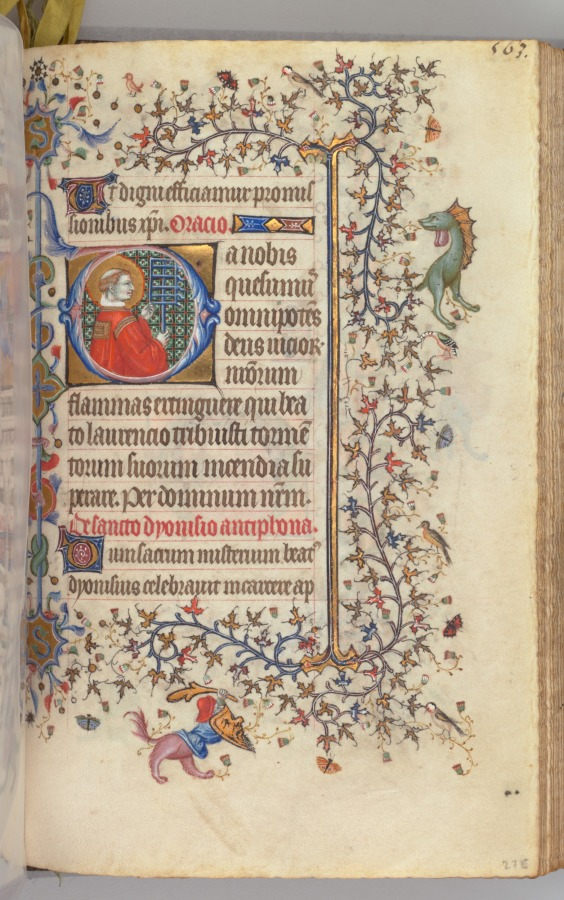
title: Hours of Charles the Noble, King of Navarre (1361-1425): fol. 276r, St. Lawrence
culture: France, Paris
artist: Master of the Brussels Initials and Associates (French)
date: c. 1405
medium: ink, tempera, and gold on vellum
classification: Bound Volume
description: This precious volume was obviously highly prized by its owner, the French-born King of Navarre, who had his coat of arms painted on no less than twenty folios. Rather than directly commissioning this manuscript from a specific workshop, it seems that Charles the Noble acquired his book of hours -- perhaps ready-made for the luxury market -- while on a trip to Paris in 1404-05. A collaborative effort, six painting styles are evidenced within the pages of this codex, those of two Italians, two Frenchmen, and two Netherlanders. The painter who was responsible for the planning and decoration of the book, and who produced seventeen of the large miniatures, was a Bolognese artist known as the Master of the Brussels Initials. His principal assistant, responsible for most of the borders, was a Florentine who signed his name "Zecho" da Firenze on folio 208 verso.